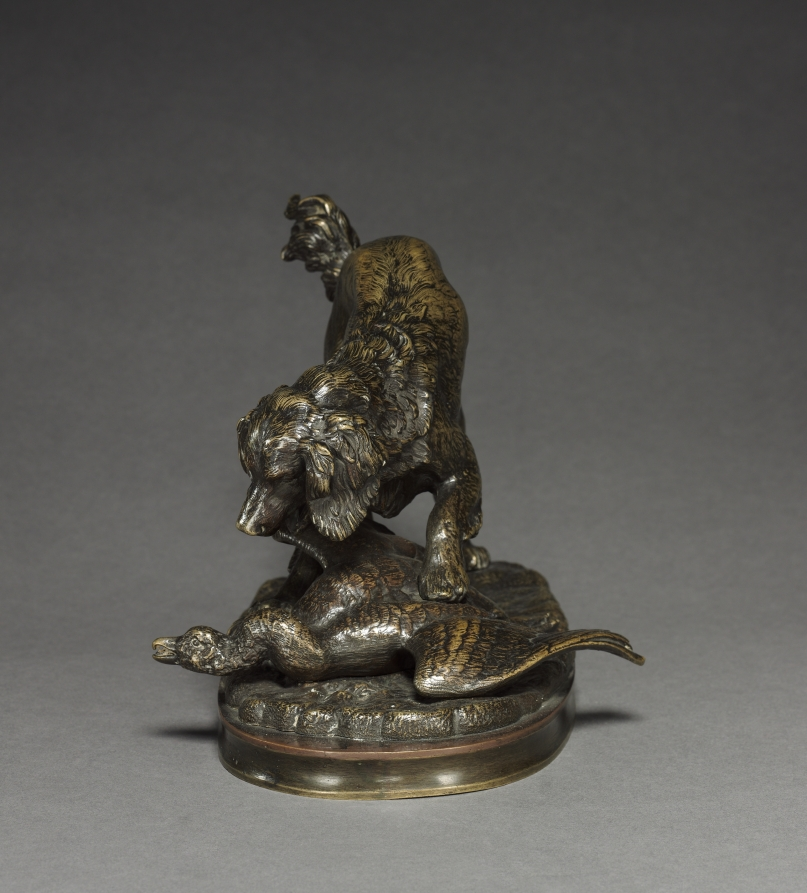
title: Spaniel and Duck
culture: France, 19th century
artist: Antoine-Louis Barye (French, 1796–1875)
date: c.1830 – 1875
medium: bronze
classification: Sculpture